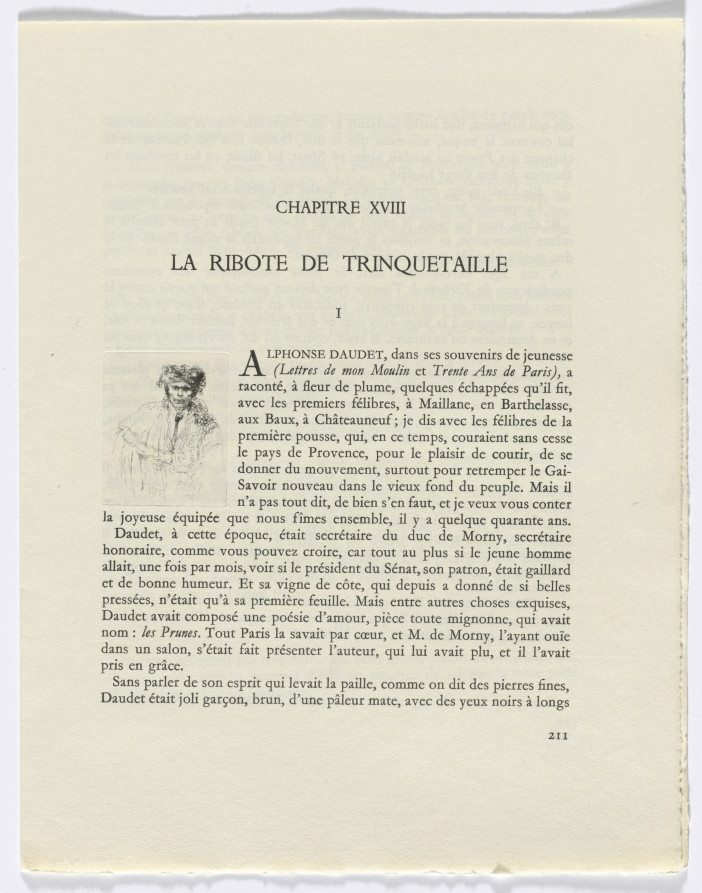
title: Frédéric Mistral: Mémoires et Recits by Frédéric Mistral: man (page 211)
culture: France, 20th century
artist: Auguste Brouet (French, 1872–1941)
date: 1937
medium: etchings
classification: Portfolio